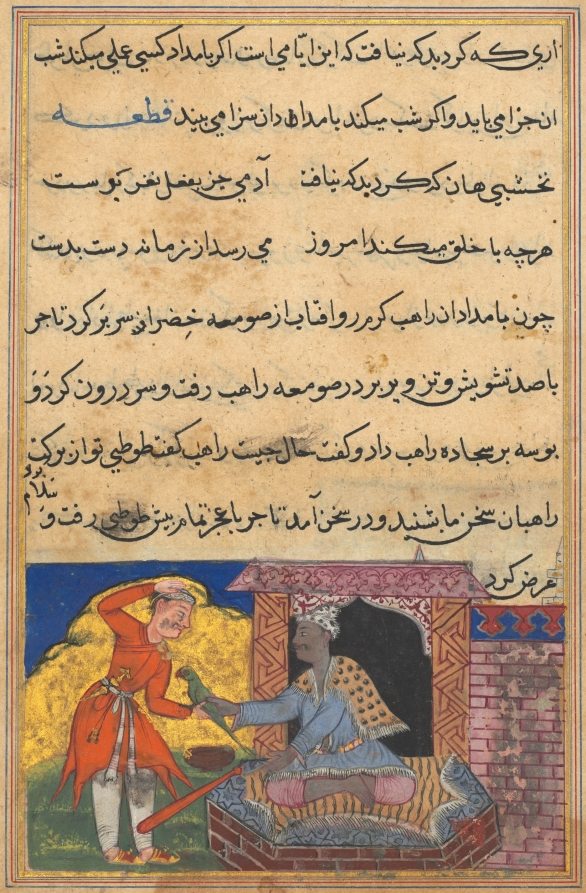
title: The monk returns the magic parrot to its rightful owner, the merchant, from a Tuti-nama (Tales of a Parrot): Tenth Night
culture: Mughal India, court of Akbar (reigned 1556–1605)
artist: Lalu (Indian, active mid-1500s)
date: c. 1560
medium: gum tempera, ink, and gold on paper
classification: Painting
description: The monk, seated and wearing a leopard-skin cape across his shoulders, hands the talking, wooden parrot back to the merchant. Previously, the monk had gotten this parrot from the wife of the vizier’s son, who had it stolen from the merchant in order to win a wager.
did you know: Sufis carried a bowl for begging alms.